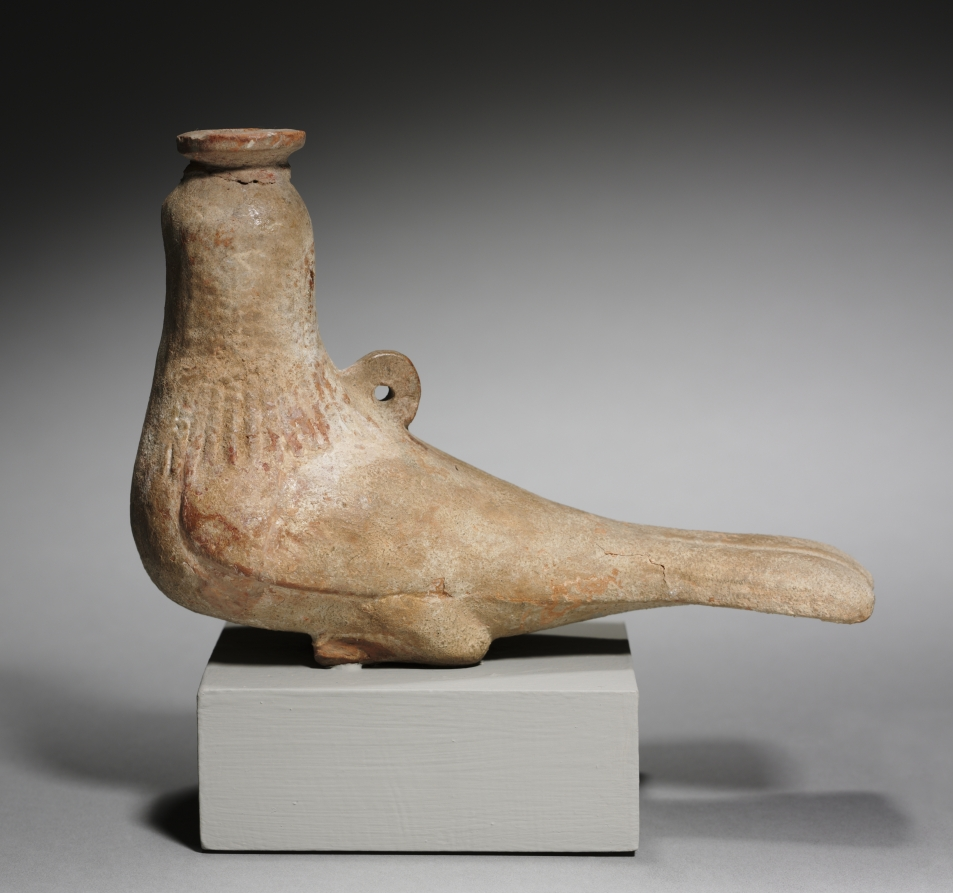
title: Siren-Shaped Perfume Flask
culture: Greece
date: 600–480 BCE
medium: terracotta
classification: Sculpture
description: A half-bird, half-woman creature, a siren lured sailors to death by the sweetness of her song. The most famous sirens appear in the ancient epic the Odyssey. Shaped like a siren, this vessel likely held valuable perfumed oil. Its small mouth limited spillage, and a string attached to the loops on its back allowed it to hand or hold a stopper.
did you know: In the Odyssey, Odysseus’s crew escapes the sirens by plugging their ears with wax.